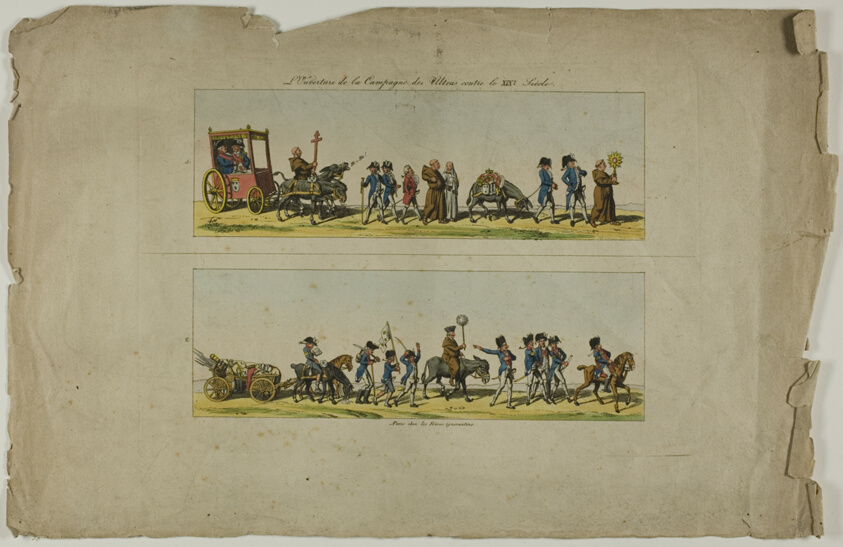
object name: Print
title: Plates One and Two, from L'Ouverture de la Campagne des Ultras contre la XIXe siecle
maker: Unknown Artist; French, 19th century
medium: Two etchings, with watercolor, on cream wove paper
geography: France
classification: prints and drawing; watercolor; etching; print